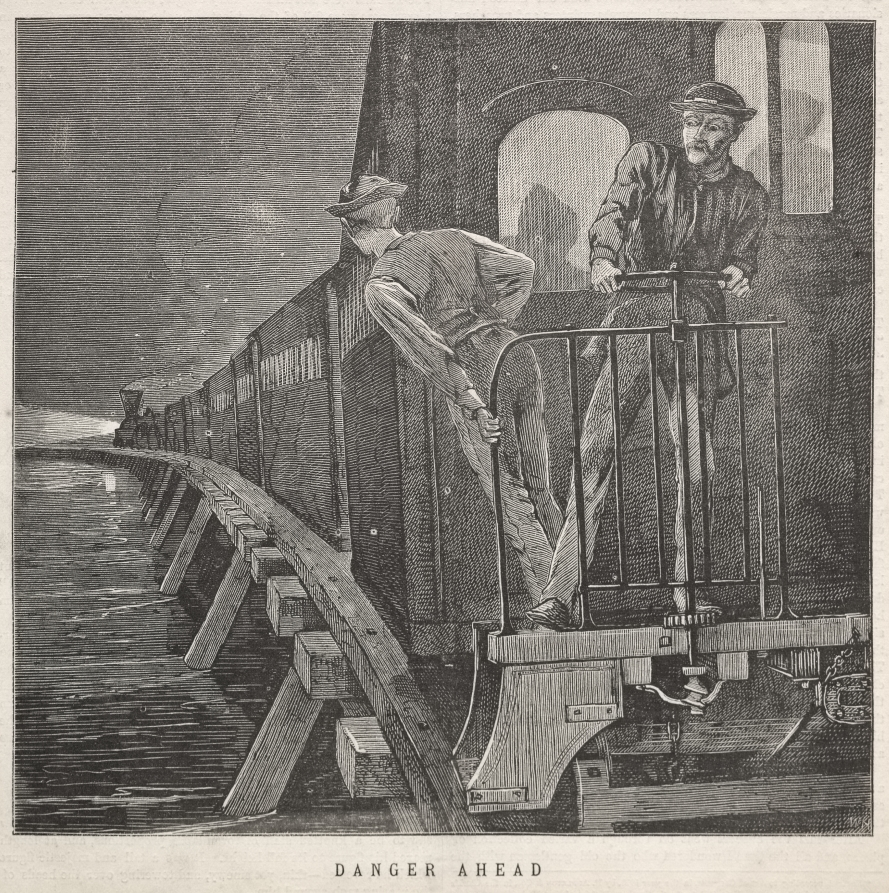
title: Danger Ahead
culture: America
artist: Winslow Homer (American, 1836–1910)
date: 1870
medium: wood engraving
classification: Print